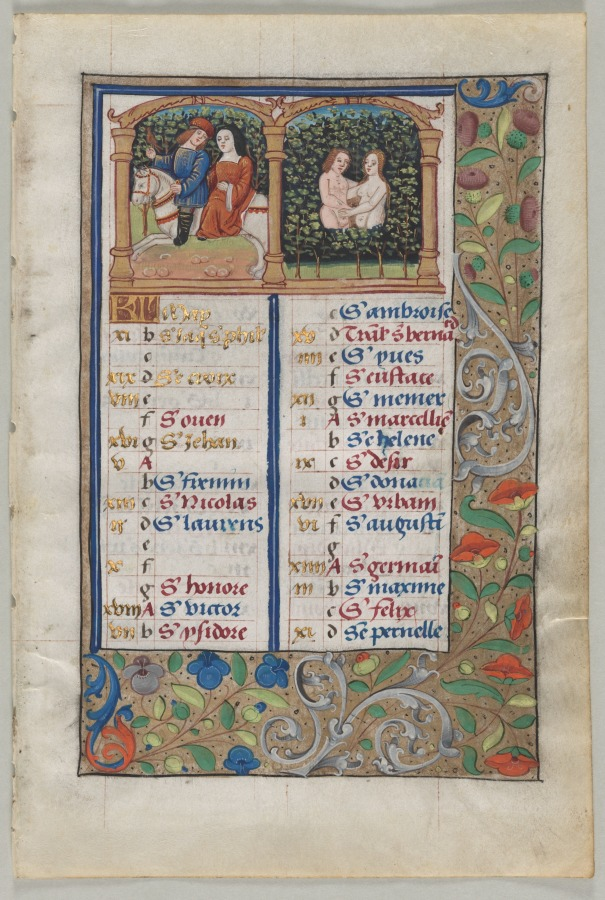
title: Leaf from a Book of Hours: Calendar Page for May (recto) and Calendar Page for June (verso) (2 of 3 Excised Leaves)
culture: France, Rouen, 16th century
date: c. 1510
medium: ink, tempera, and liquid gold on vellum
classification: Manuscript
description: The calendar is usually located at the beginning of a book of hours. Much like calendars today, those in books of hours mark important days to be acknowledged throughout the year. These calendars are perpetual calendars, meaning adjustable, as to be accurate every year. Months are often illuminated with an image of the type of labor or zodiac sign associated with them, such as grapes in September, the month in which they were harvested. In more lavish books, the most important days are done in gold, red, or blue, while lesser days are in brown or black ink. Running along each column are letters, which would have helped readers quickly identify Sundays. Every year, a different letter would indicate Sundays. Also running along the page are golden numbers, roman numerals used to indicate full and new moons and help identify holidays like Easter that do not fall on the same date yearly.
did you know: It is believed that medieval men and women read their books of hours aloud, not silently.